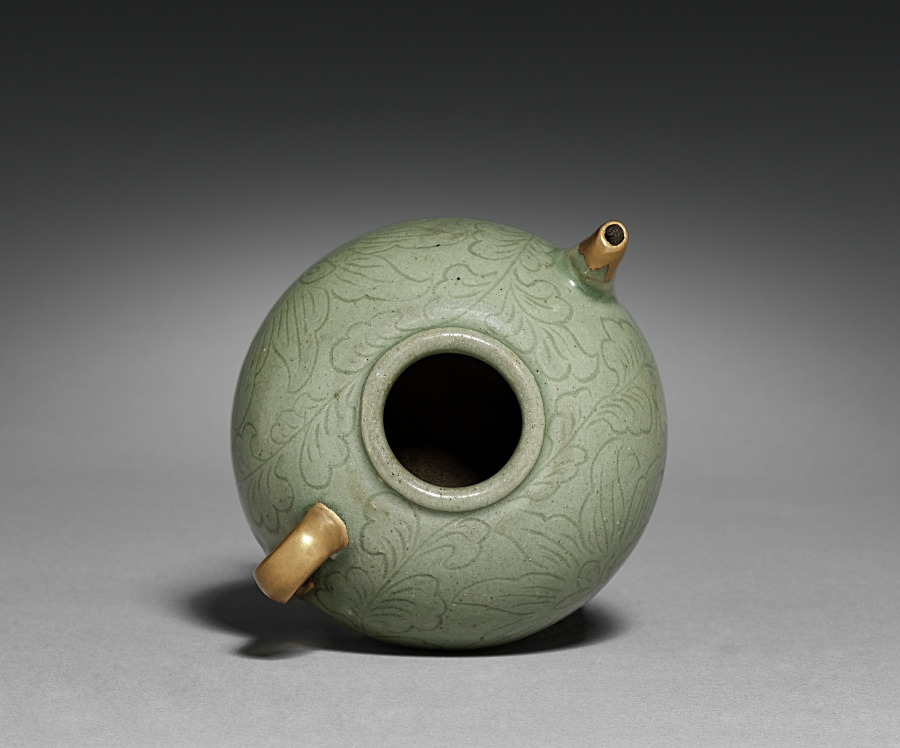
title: Wine Ewer with Incised Scroll Design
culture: Korea, Goryeo dynasty (918–1392)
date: 1100s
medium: celadon with incised and carved design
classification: Ceramic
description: Many celadon ceramics, such as these two miniature pots, have been repaired with gold lacquer. Termed kintsugi (literally meaning “gold joinery”) in Japanese, this restoration method highlights broken parts with glittering gold mixed with lacquer. Initiated in 15th-century Japan, the technique follows a popular aesthetic concept called wabi-sabi, which finds beauty in imperfect things. Goryeo celadons were considered rare treasures among early 20th-century Japanese collectors; thus, their broken condition is brilliantly highlighted in gold lacquer, as seen here in the repaired spouts, handle, and lid.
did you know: Termed kintsugi (literally meaning “gold joinery”) in Japanese, this method of repairing broken parts with glittering gold mixed with lacquer was extensively used for ceramic works in the Goryeo period, such as this one.